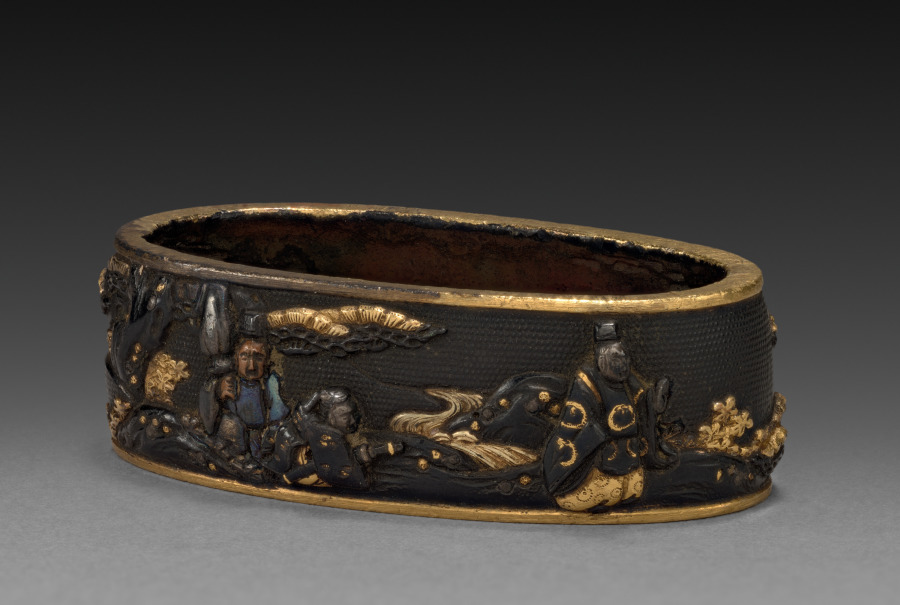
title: Sword-Hilt Collar (Fuchi)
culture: Japan, Edo period (1615–1868)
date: 1700–1850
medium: shakudo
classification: Arms and Armor